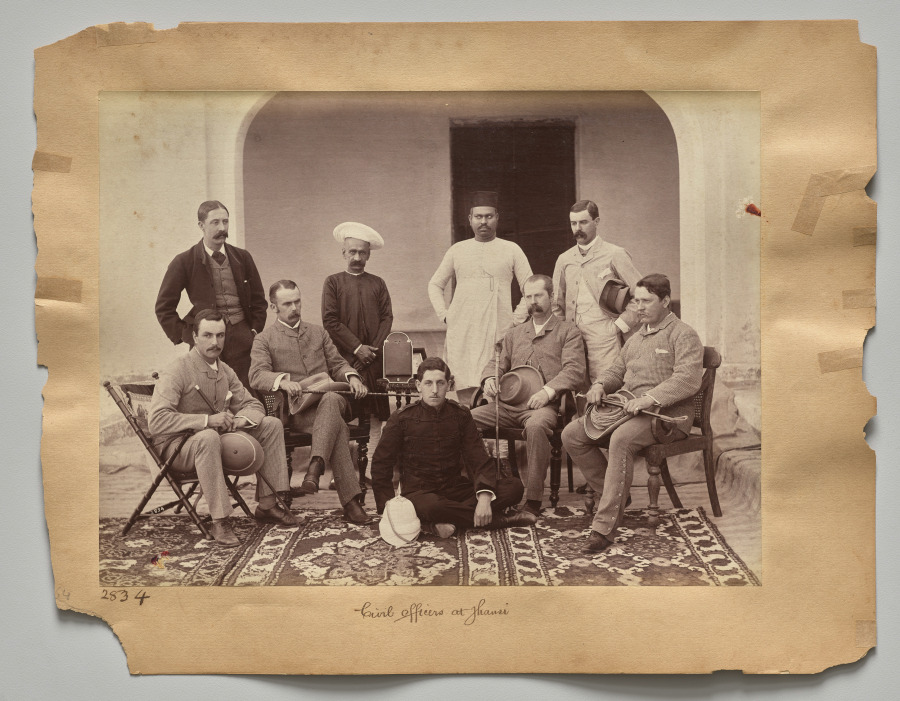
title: Civil officers at Jhansi (recto)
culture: India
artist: Raja Deen Dayal (Indian, 1844–1905)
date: c. 1882–87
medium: albumen print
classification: Photograph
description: These photographs are part of an album, now disassembled, of around 105 photographs taken in India between 1885 and summer 1887 that provide glimpses into the lives of the British colonial elite and royal and upper-class Indians. The museum holds another group of 37 pictures from this album (2016.266), which was probably commissioned by a British civil servant visiting or working in India around 1888 as a personal souvenir of his experiences there.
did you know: Raja Deen Dayal is regarded now, and was considered during his lifetime, to be India’s most important 19th-century photographer.